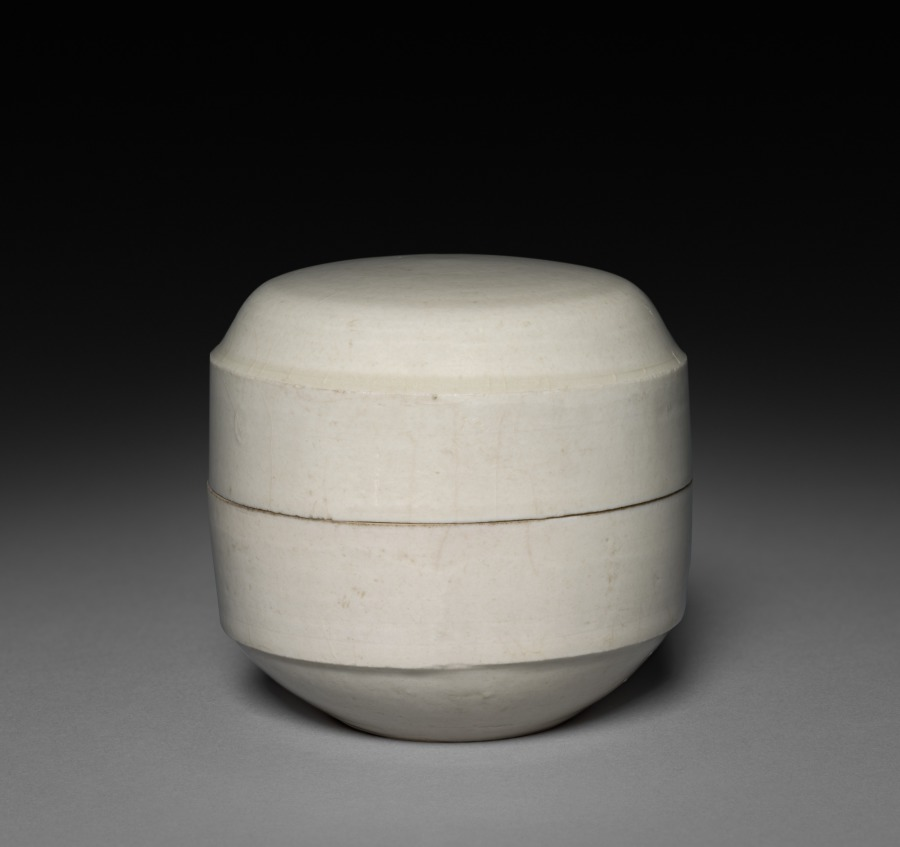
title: Covered Box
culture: China, Hebei province, Quyang, Northern Song dynasty (960–1127)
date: 1000s–1100s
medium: white porcelain, Ding ware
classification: Ceramic